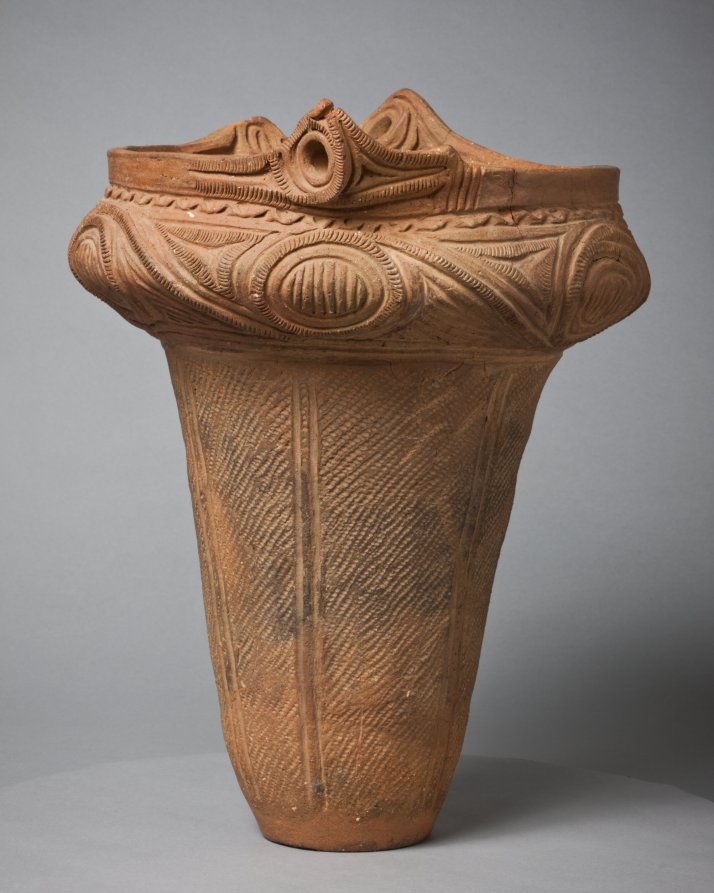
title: Urn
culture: Japan, Jōmon period (c. 10,500–300 BCE)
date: c. 2000 BCE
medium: earthenware, terracotta, impressed and incised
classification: Ceramic